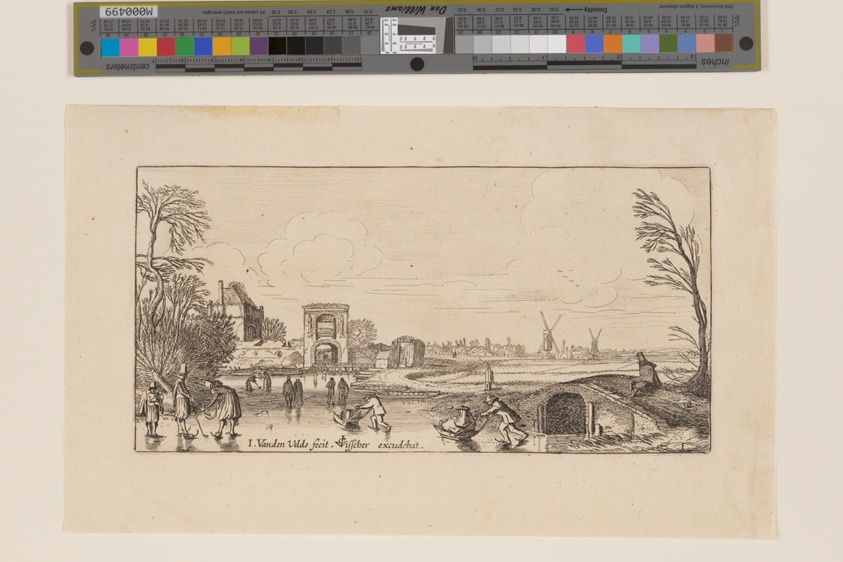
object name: Print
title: Winter Landscape, from Six Landscapes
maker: Jan van de Velde II; Dutch, c. 1593–1641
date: c. 1613-1640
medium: Etching on ivory laid paper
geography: Netherlands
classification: etching; paper; print; prints and drawing